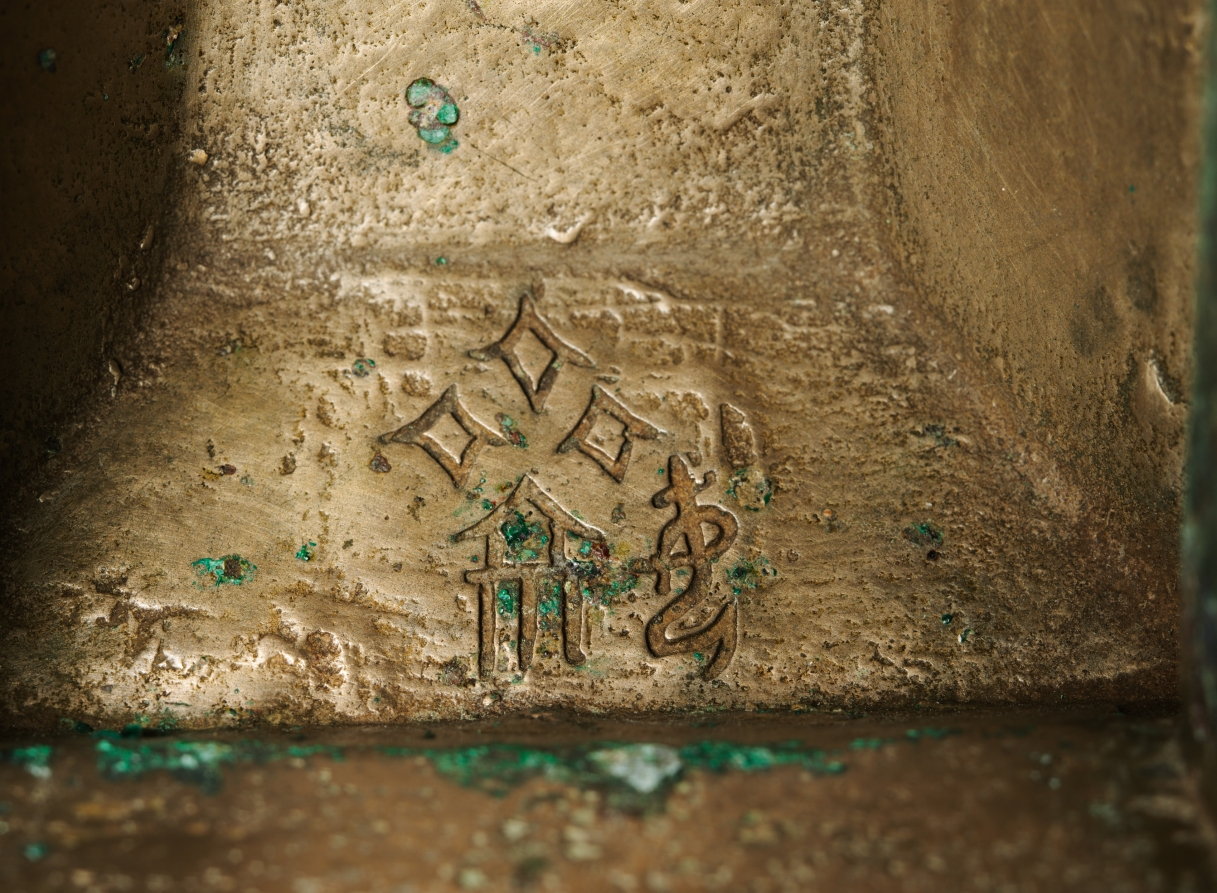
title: Square Wine Container (Fangyou)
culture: China, Henan province, probably Anyang, Shang dynasty (c. 1600–c. 1046 BCE), Anyang phase (c. 1250–1046 BCE)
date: c. 1250–1046 BCE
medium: bronze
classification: Metalwork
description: From the finely proportioned body to the elaborate decoration cast with great precision, this ritual wine vessel displays the artistic refinement and technical virtuosity that marked the full blossoming of late Shang bronze art. The dramatic contrast of the crested birds (kuifeng) against the dense background of spiral patterns (leiwen) gives the vessel a new force, clarity, and intense vitality. The distinctive square body also places it as a rare and important type among the more usual round or ovoid types.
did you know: The bird motif decoration of this bronze is uncommon; more often these bronzes are decorated with a combination of birds and dragons.